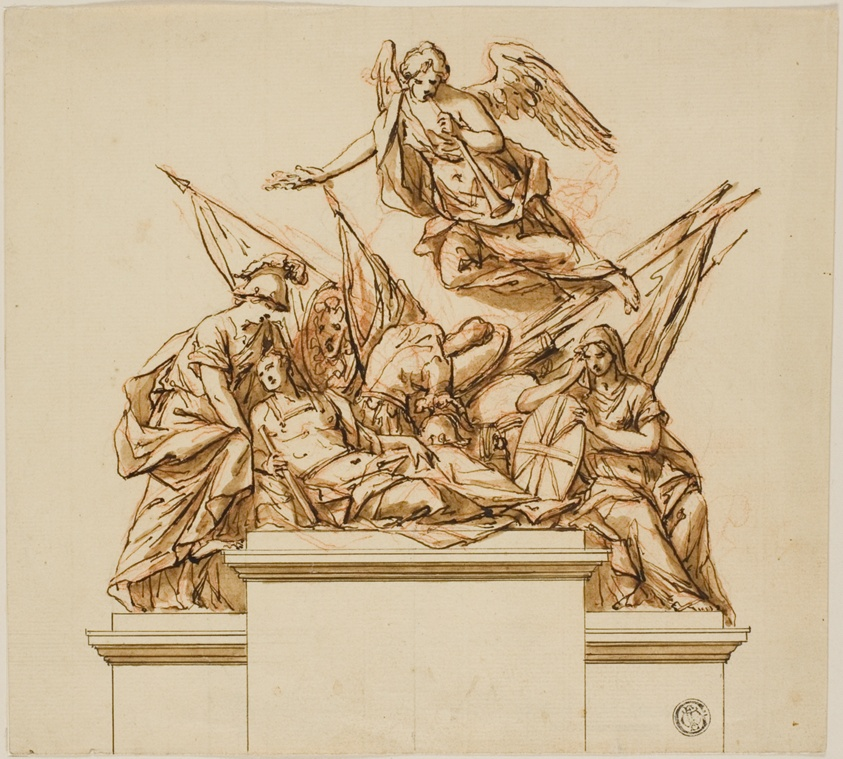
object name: Drawing and Watercolor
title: Warrior Accompanied by Britannia, Minerva, and Fame (recto); Design for the Monument to Nicholas Rowe (verso)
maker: John Michael Rysbrack (Flemish, 1693-1770); or Richard Wilson (English, 1714-1782)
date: c. 1733 (recto); c. 1740 (verso)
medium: Pen and brown ink, with brush and brown wash, over red chalk and graphite (recto); pen and brown ink over graphite (verso), on cream laid paper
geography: Flanders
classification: pen and ink drawings; drawings (visual works); prints and drawing